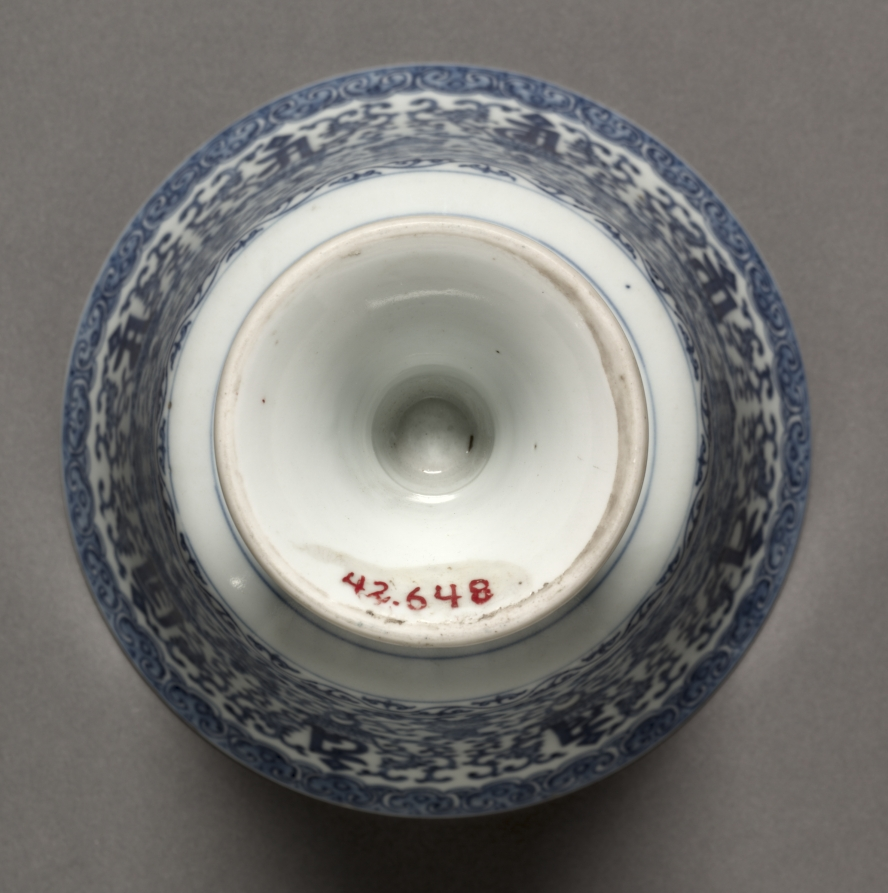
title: Stem Cup with Tibetan Characters and Buddhist Symbols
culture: China, Qing dynasty (1644-1911), Qianlong mark and reign (1736-95)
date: 1736–95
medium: porcelain with underglaze blue decoration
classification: Ceramic